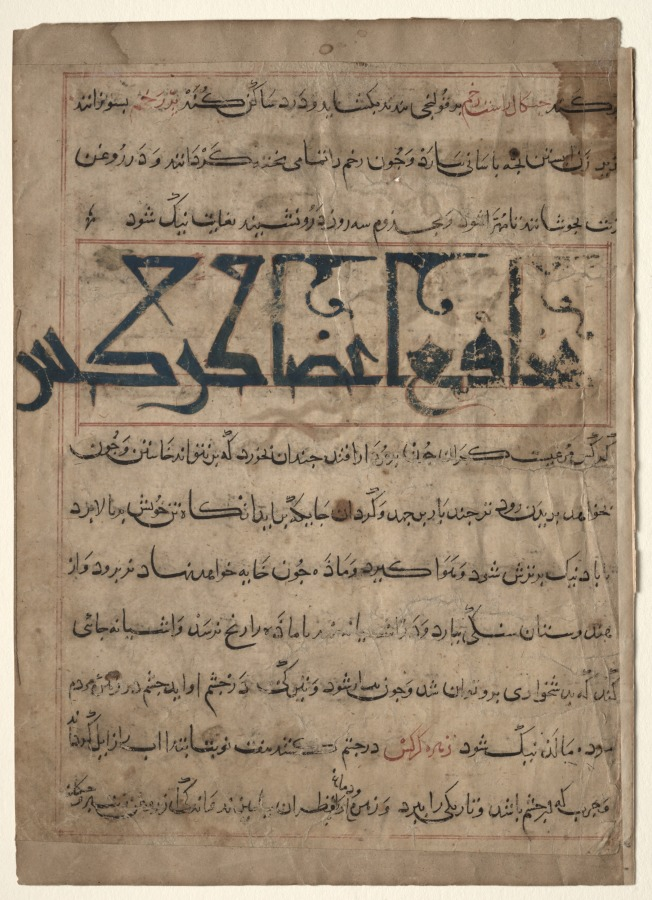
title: "Benefits of the Parts of Vultures" (From the Manafi' al-Haywan of Abu Sai'd Ubayd-Allay Ibn Bakhtishu) (verso)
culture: Iran, Marageh, Mongol Period (Ilkhanid), late 13th Century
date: late 1200s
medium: opaque watercolor, ink and gold on paper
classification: Manuscript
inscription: Script: Naskh